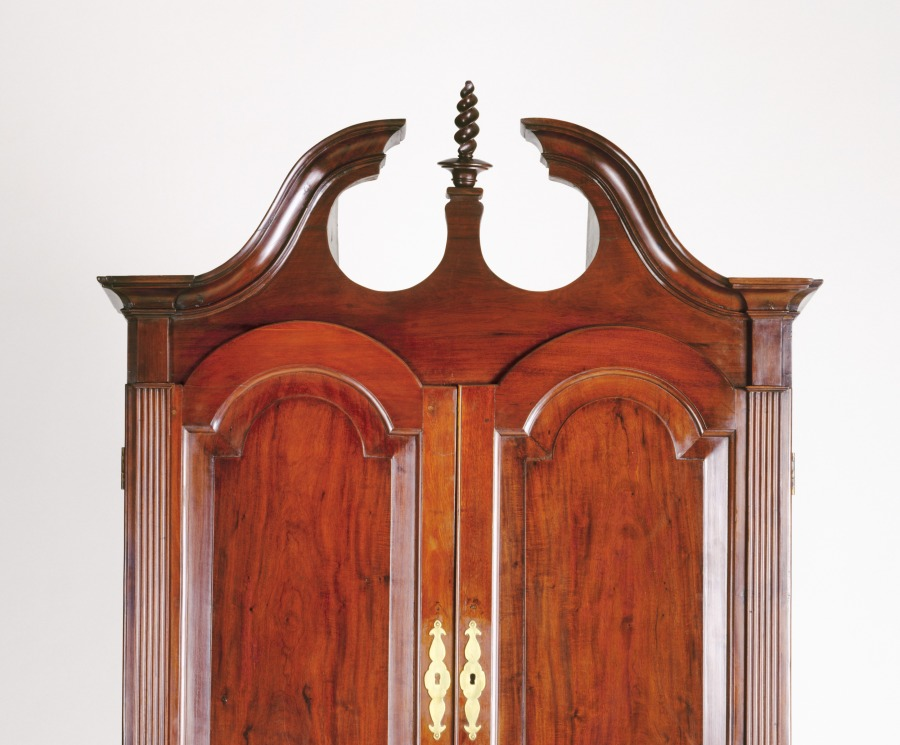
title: Desk and Bookcase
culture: America, Massachusetts, Boston or vicinity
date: c. 1780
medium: mahogany and pine, brass hardware, gilding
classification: Furniture and woodwork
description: During the 1700s, a desk and bookcase, sometimes called a bureau in early inventories, was among the largest and most expensive pieces of furniture in a household. Their owners were chiefly businessmen and community leaders, and because of their function as repositories for personal letters and documents, they were usually placed downstairs in a back parlor or hall. A desk and bookcase consisted of two parts: usually a slant-top desk below and a cabinet above that sat within moldings applied to the desktop to hold it in place. The form often included elements derived from contemporary architecture. Like much New England furniture of the later 1700s, the lower section of this example is block-fronted, in which the profile recedes in the center and protrudes at either side. Though some European precedents can be found for block fronting, this type of cabinetry was clearly more popular in America than anywhere else.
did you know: A desk and bookcase in the 1700s, often equipped with several locks and keys as in this example, served as a self-contained office for the gentleman of the household.